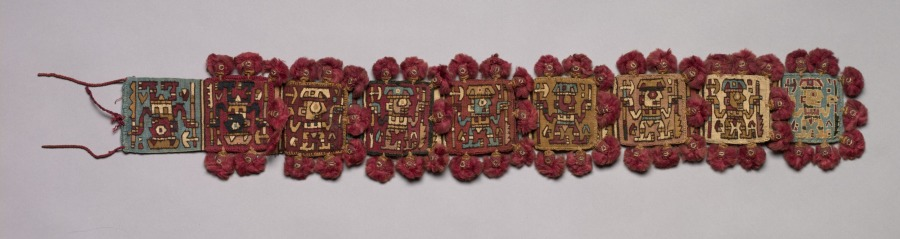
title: Band (Headband?)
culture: Central Andes, Moche-Wari Style, mid-7th to mid-9th century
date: c. 650–850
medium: Camelid fiber (alpaca; weft) and cotton (warp); tapestry weave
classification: Textile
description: This jewel-like textile, perhaps the only one of its kind, is made from a single band accordion-folded to form tabs, each edged with lush red tassels. Repeated in different colors down its length is the image of a warrior who holds an axe in one hand and a jagged, club-like object in the other. The reversed orientation of several of the warriors may be the result of the weaving method.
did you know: This unusual band may have been worn as a headband.